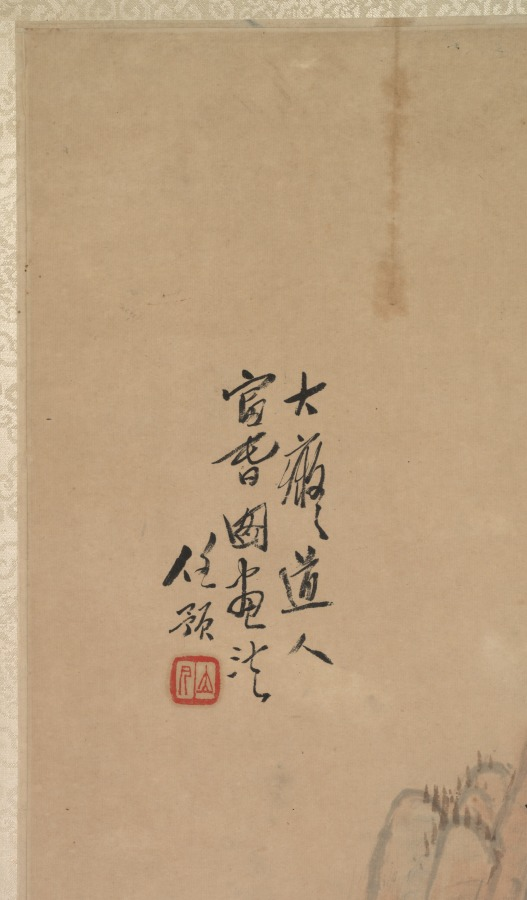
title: Landscape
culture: China, Qing dynasty (1644-1911)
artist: Ren Yu (Chinese, 1853–1901)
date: 1892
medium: Hanging scroll; color on paper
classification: Painting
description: This seasonal landscape is from a set of four hanging scrolls by Ren Yu. He was the youngest, most eccentric, and least prolific of the Four Rens, a family of prominent painters in Shanghai during the late Qing dynasty (1644–1911). Perhaps due to his opium habit and subsequent financial difficulties, Ren Yu tended to be lackadaisical in his work. The few remaining high-quality paintings hint at his artistic potential lost to opium. Though Ren’s premature death left his artistic promise unfulfilled, his paintings were acquired and donated to the museum by Charles Lang Freer (1854–1919), a wealthy businessman and art collector from Detroit. As Freer had hoped, this donation of Ren Yu paintings inspired the young Cleveland Museum of Art to continue to expand its own Chinese painting collection.